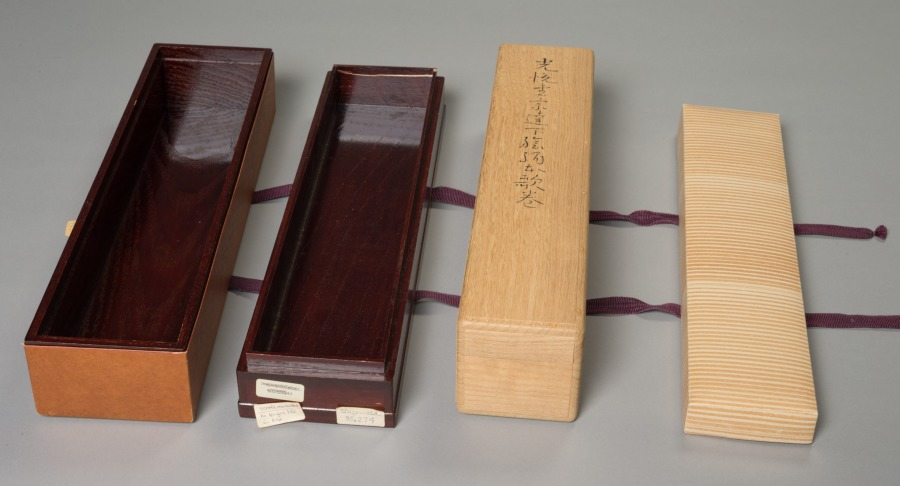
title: Two Beauties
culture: Japan, Edo period (1615–1868)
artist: Kitao Shigemasa (Japanese, 1739–1819)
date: late 1700s–early 1800s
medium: hanging scroll, pillar painting: ink and color on silk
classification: Painting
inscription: Artist's signature and seal, lower right corner. Poem inscribed on upper section of scroll.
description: Shigemasa favored using colors in broad opaque masses, as seen here in the beauties’ robes. He was a painter, printmaker, and poet, specializing in courtesan and actor prints. The format of this hanging scroll or "pillar painting" allows for the work to be hung on a pillar in a Japanese home.